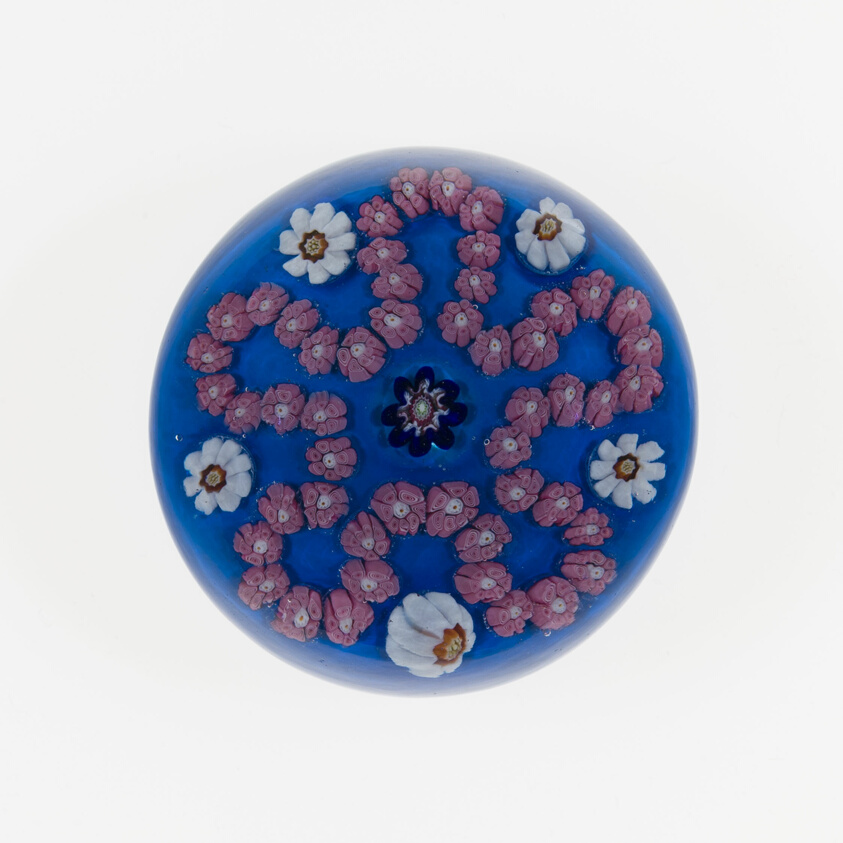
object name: Glass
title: Paperweight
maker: Clichy Glassworks (Cristalleries de Clichy); Clichy, France, 1837-1885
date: 19th century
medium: Glass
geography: Clichy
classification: paperweight; glass